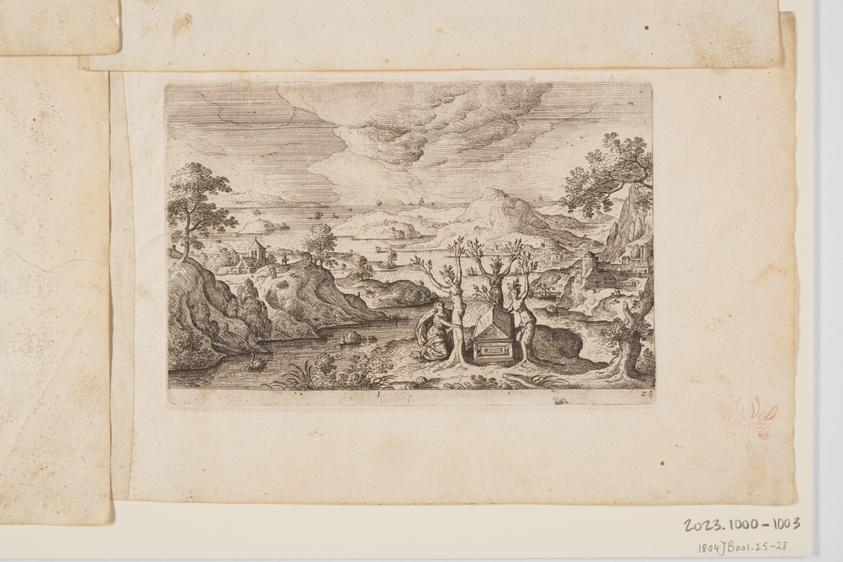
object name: Print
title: Plate 28, from Landscapes with Scenes from the Old and New Testament and Ovid’s Metamorphoses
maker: Hans Bol (Flemish, 1534–1593); published by Philip Galle (Flemish, 1537–1612)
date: 1574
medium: Etching on ivory laid paper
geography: Flanders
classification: print; paper; prints and drawing; etching